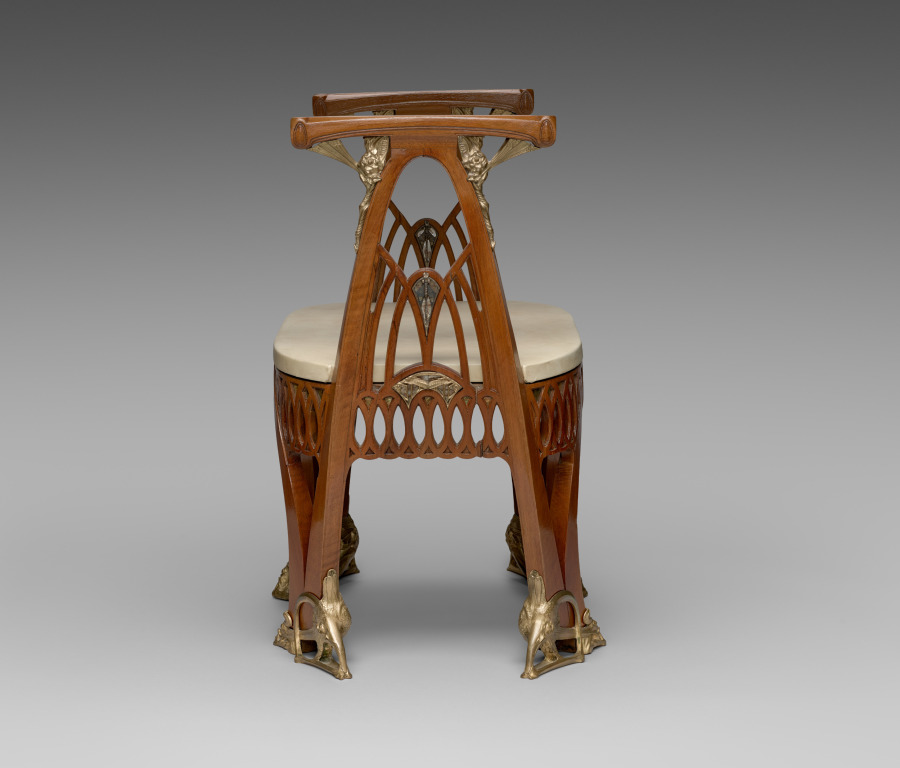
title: Tabouret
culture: France, Paris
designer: Carlo Bugatti (Italian, 1856–1940)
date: c. 1907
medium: Mahogany, parchment, gilt bronze, mother-of-pearl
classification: Furniture and woodwork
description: Although this tabouret is undocumented, its design, with its interlaced ovoid forms, gilt cast metal mounts, and mother-of-pearl inlays, is so close in style to the Cleveland Museum of Art’s celebrated tea table (1991.45) that it too can be assigned to Bugatti's Parisian period and dated about 1907.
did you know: Carlo Bugatti's son Ettore founded the luxurious car company Bugatti Automobiles.